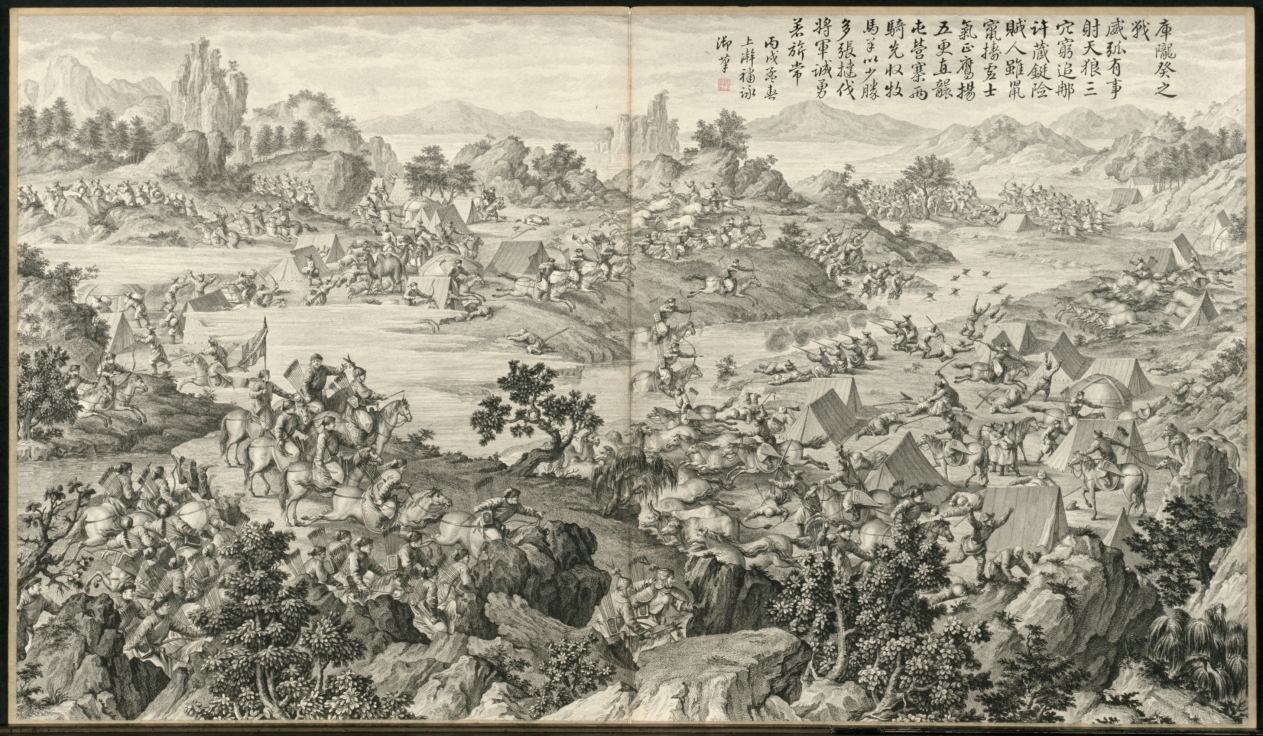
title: Battle of Kulongkui: from Battle Scenes of the Quelling of Rebellions in the Western Regions, with Imperial Poems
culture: China, Qing dynasty (1644–1911), Qianlong reign (1736–95)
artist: Jean Damascene Sallusti (Italian, d. 1781)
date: c. 1765–74; poem dated 1766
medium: etching, mounted in album form, 16 leaves plus two additional leaves of inscriptions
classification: Print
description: This set of etchings was commissioned by Emperor Qianlong to record in pictorial terms the courage of his generals and soldiers in quelling the rebellions in the Western Regions. Qianlong added his own poem to each of the etchings, indicating his appreciation and pride in this demonstration of military might. "Western Regions" refers to the present-day Xingjiang province, often described in Western writing as "Central Asia."